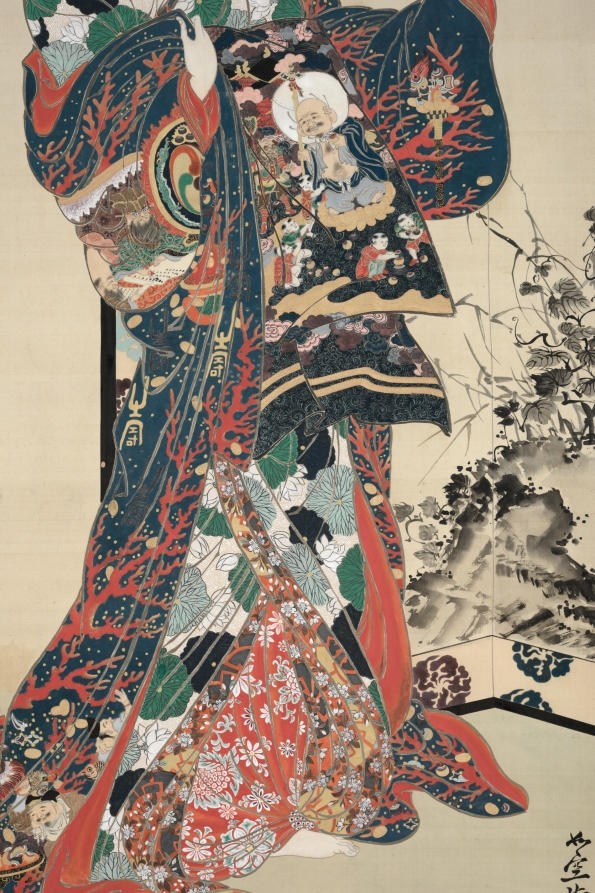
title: Hell Courtesan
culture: Japan, Meiji period (1868–1912)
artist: Kawanabe Kyōsai (Japanese, 1831–1889)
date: 1871–89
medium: Hanging scroll; ink, color, gold, and silver on silk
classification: Painting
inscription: artist's signature and two seals, lower right.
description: Kawanabe Kyōsai repeated this large-scale composition with variations a number of times. In this version, a famous 15th-century courtesan known for wearing a robe with images of the Buddhist hells stands before a folding screen. Legend has it that she was abducted by bandits, and wore the garment to symbolize her belief that her suffering in her current life was punishment for sins committed in a former life. Here, in a parody depiction of the garment, the courtesan stands in for Benzaiten, the goddess of everything that flows, while the remaining members of the Seven Gods of Good Fortune appear on her outer robe. One of them reports sins to Enma, the King of Hell, who is writing out his judgments on the recently deceased.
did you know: The word for longevity appears multiple times in gold and silver on her outer robe.